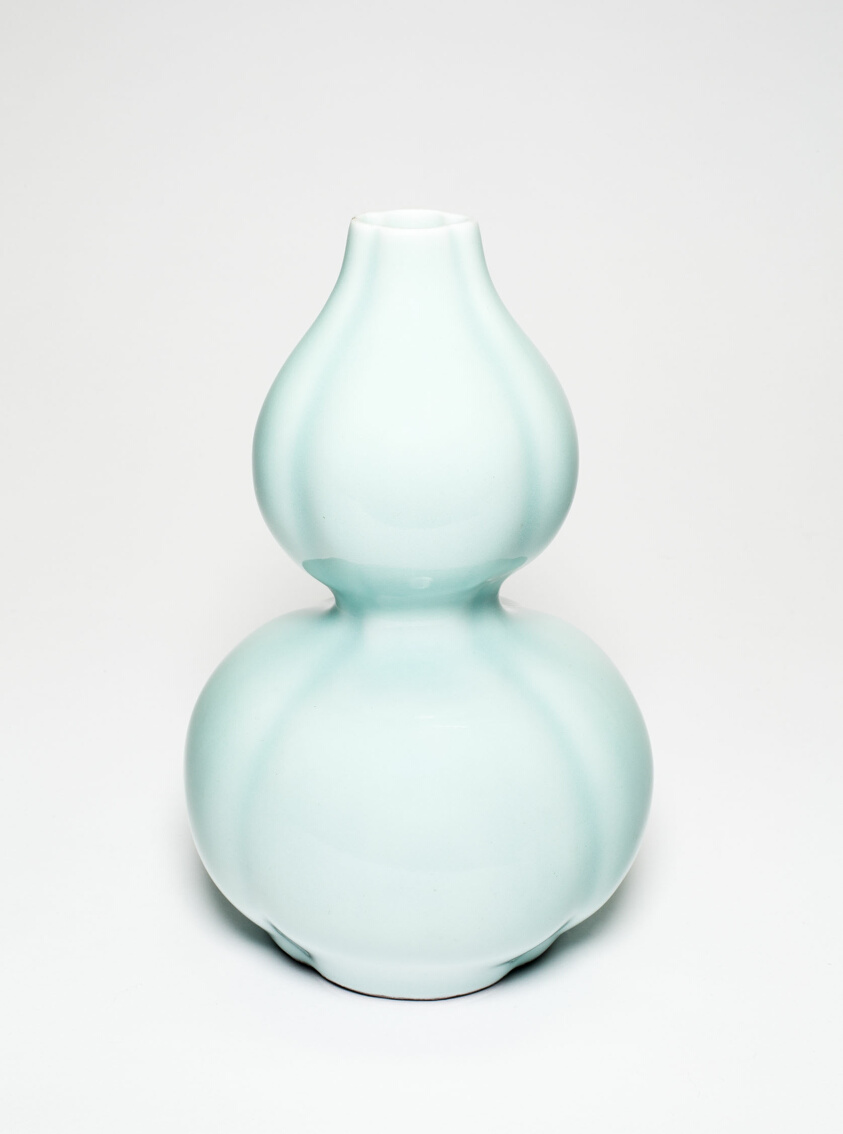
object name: Vessel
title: Lobed Gourd-Shaped Vase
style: Chinese (culture or style)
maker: China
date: Qing dynasty (1644–1911), Qianlong reign mark (1736–1795), c. 19th/20th century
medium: Celadon-glazed porcelain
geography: China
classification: vase; porcelain; vessel; asian art; ceramics